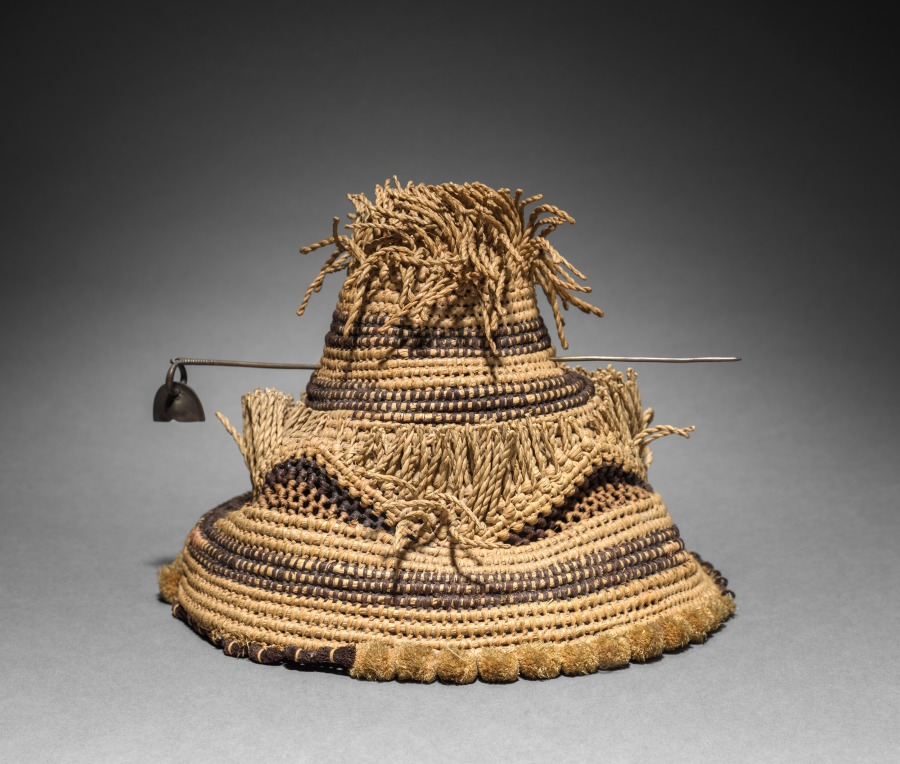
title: Hat (laket mishiing) with Pin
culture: Africa, Central Africa, Democratic Republic of Congo, early 20th century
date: early 1900s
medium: Raffia, metal, and dye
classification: Garment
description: Titled Kuba men and prominent women wear the laket, a small ornate dome-shaped hat. An essential fashion item of adult men in good social standing, it focuses special attention on the head as a significant marker of individual identity, ethnic affiliation, status, and role in society. This prestige object is secured on the crown of the head with a nine-and-a-half-inch metal pin that pierces through the hat onto a clump of hair. The laket is made from raffia palm fiber coiled into threads and woven in two alternating patterns and contrasting light and dark (dyed) wefts. There are two examples of the laket: the plain type with the flat top, and the more elaborate type called the laket mishiing.